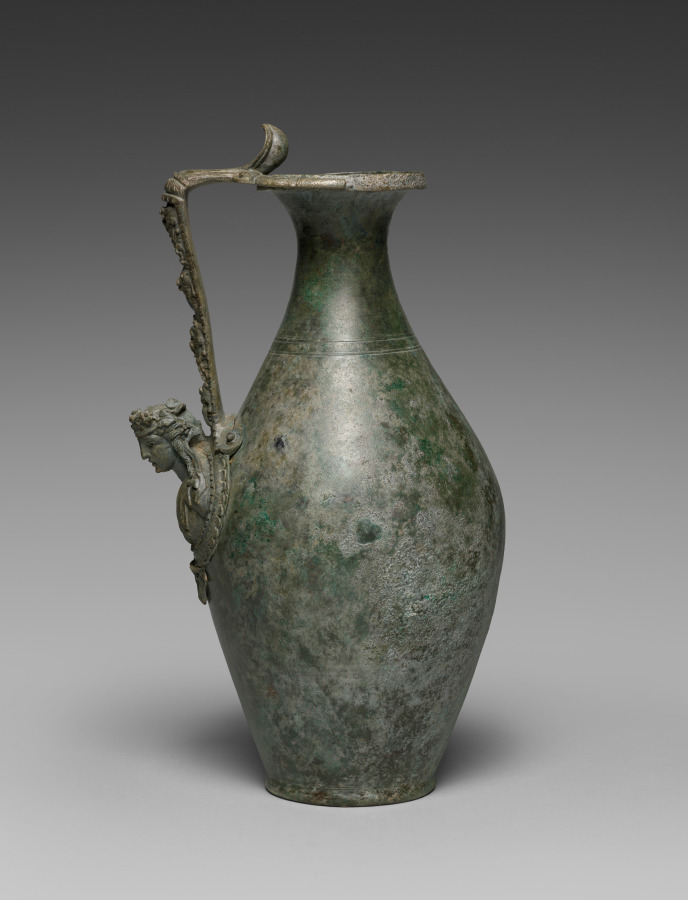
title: Olpe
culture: Italy, Roman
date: 1–100 CE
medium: cast bronze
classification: Metalwork